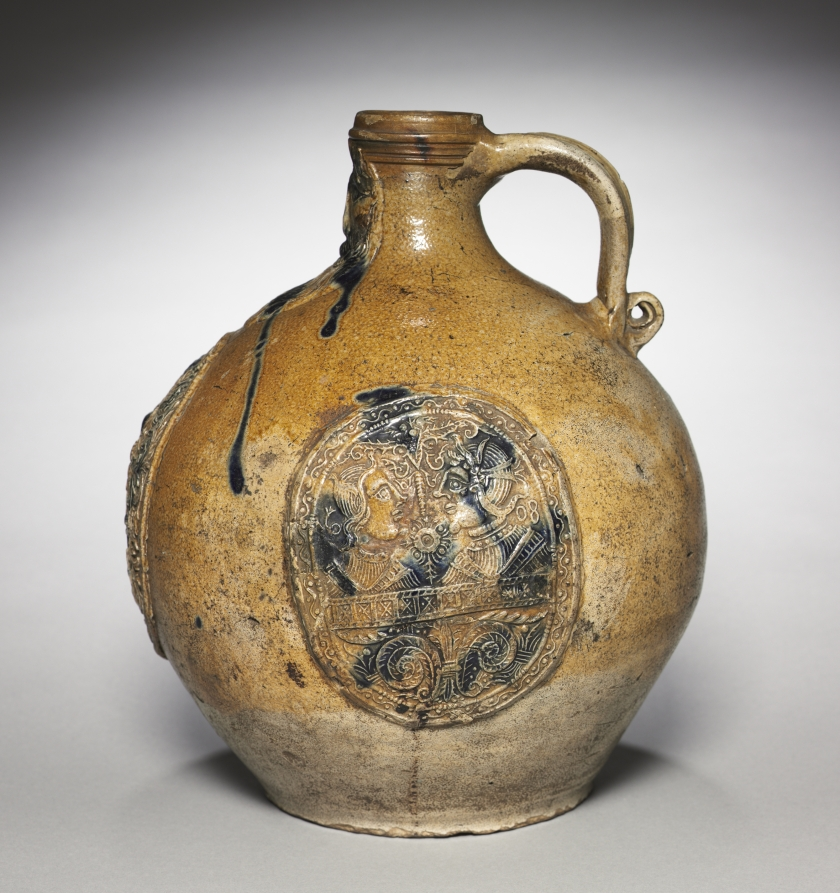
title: Jug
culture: Germany, Frechen, 17th century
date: 1608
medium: salt-glazed stoneware with applied and impressed decoration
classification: Ceramic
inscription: above the shield: 1608.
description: These globular jugs decorated with bearded masks on their necks represent an important type of Rhenish stoneware made from the 1400s onward. They were named "Bartmann" (Bearded Man) or "Bellarmine" jugs. The latter was a reference to Cardinal Bellarmine (1542–1621)—hated in Germany for his Counter-Reformational zeal—because of his supposed resemblance to the bearded images on these vessels. This jug bears the arms of the Pallant van Culemborg family of Gelders. The production and export of German stoneware reached its peak in the late 1500s. Prized for its durability and stone-like appearance, German stoneware became one of the most widely traded forms of pottery, even finding popularity in early America. The distinctive pebbly glass surface, resembling an orange peel, was achieved by introducing salt into the hot kiln during the firing process. This glaze gave clear definition to the coats of arms or other emblems that often formed the surface decoration on large works, usually jugs.